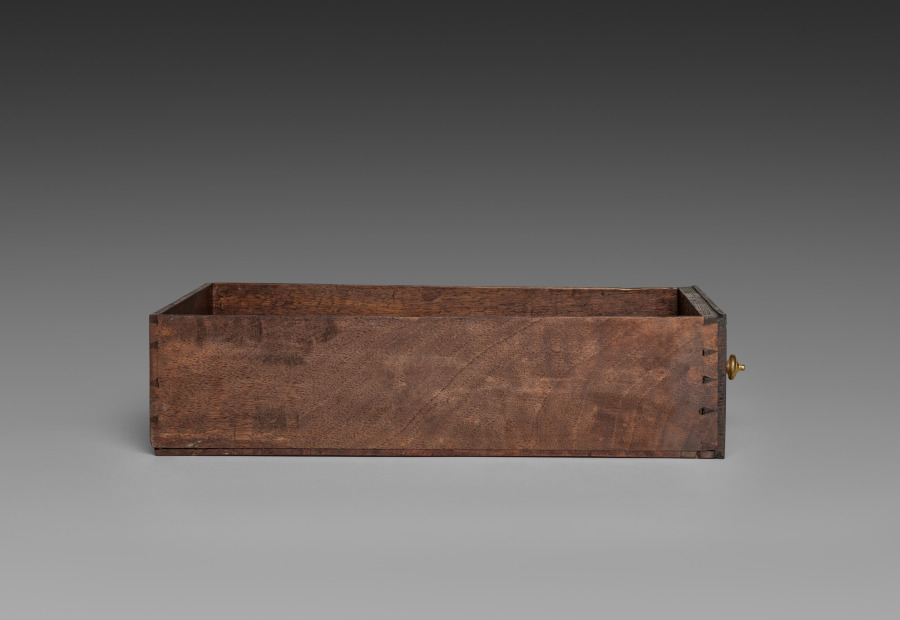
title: Interior Drawer for Cabinet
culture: France, late 17th Century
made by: André-Charles Boulle (French, 1642–1732)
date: c. 1690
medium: ebony, marquetry in metal and tortoiseshell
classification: Furniture and woodwork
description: Appointed cabinetmaker to King Louis XIV in 1672, André-Charles Boulle became a master of furniture making in France during the late 1600s until his death in 1732. Known primarily for his use of marquetry, in which metal patterns are inlaid into tortoiseshell then applied within the veneered surface of the furniture, Boulle established a level of quality and craftsmanship few others could achieve. As a result, his work found favor at the royal court and among other aristocrats and diplomats eager to impress the king. The inclusion of a medallion depicting Louis XIV within the bronze decoration of this chest would have identified the owner with the royal court. Often exhibiting stout architectural proportions with elegant groups of inlaid motifs such as the parrot on the central panel of this chest, Boulle’s designs are an example of the intellectual fashion for contrasting ideas, materials, and motifs.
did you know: Originally designed to sit atop an elaborate tall stand, this chest was likely altered in the late 1700s to reduce its scale and height.